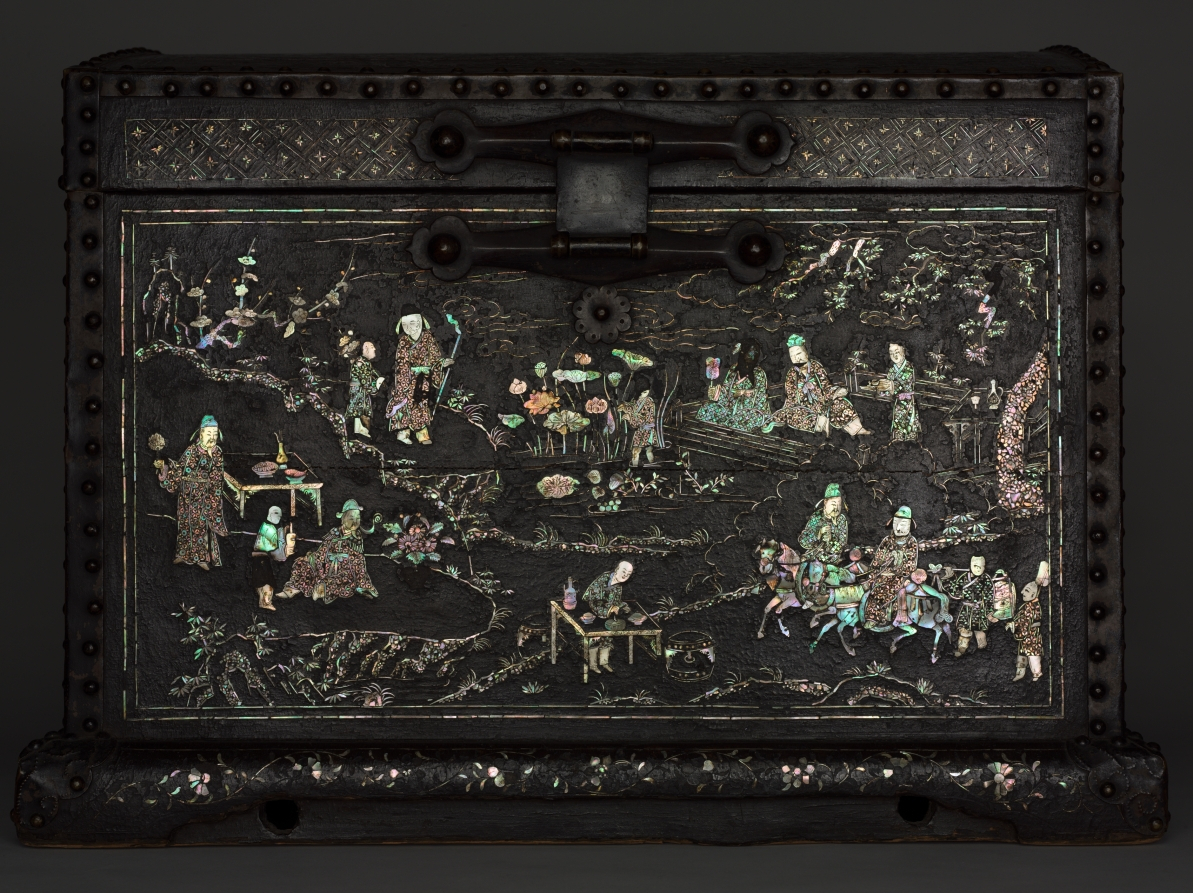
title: Chest for Storing Garments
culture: China, Ming dynasty (1368–1644)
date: 1400s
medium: lacquered wood with mother-of-pearl inlay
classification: Lacquer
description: This precious lacquer box is decorated with bird and plant motifs and figures in mother-of-pearl inlay. The decoration depicts the leisurely pursuit of scholars in nature and a garden setting. Scholars play the board game weiqi, have philosophical conversations, pluck a qin (a zither-like instrument with strings), and read books. Lacquer chests of this type were used to store garments neatly folded along their straight seams. The mother-of-pearl inlay from shells is a technique that was typically practiced by craftsmen in Hangzhou and other parts of southeast China near the sea.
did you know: Lacquer chests of this type were used to store garments.